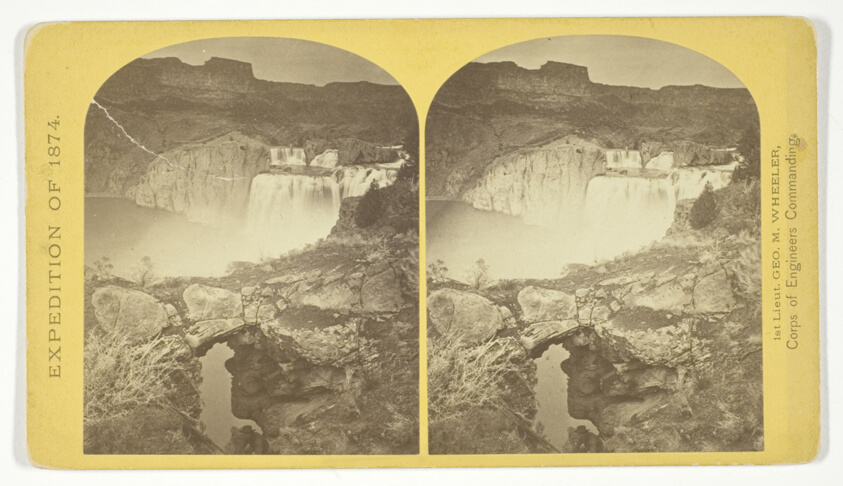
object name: Photograph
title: Shoshone Falls, Snake River, Idaho. Gorge and natural bridge, in the fore-ground, No. 50 from the series "Geographical Explorations and Surveys West of the 100th Meridian"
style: 19th century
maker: Timothy O'Sullivan (American, born Ireland, 1840–1882); commissioned by George Wheeler for the War Department, Corps of Engineers, U.S. Army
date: 1874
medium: Albumen print, stereo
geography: United States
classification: stereograph (albumen); photography; photograph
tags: Collected by Hugh Edwards, Geographical Explorations and Surveys